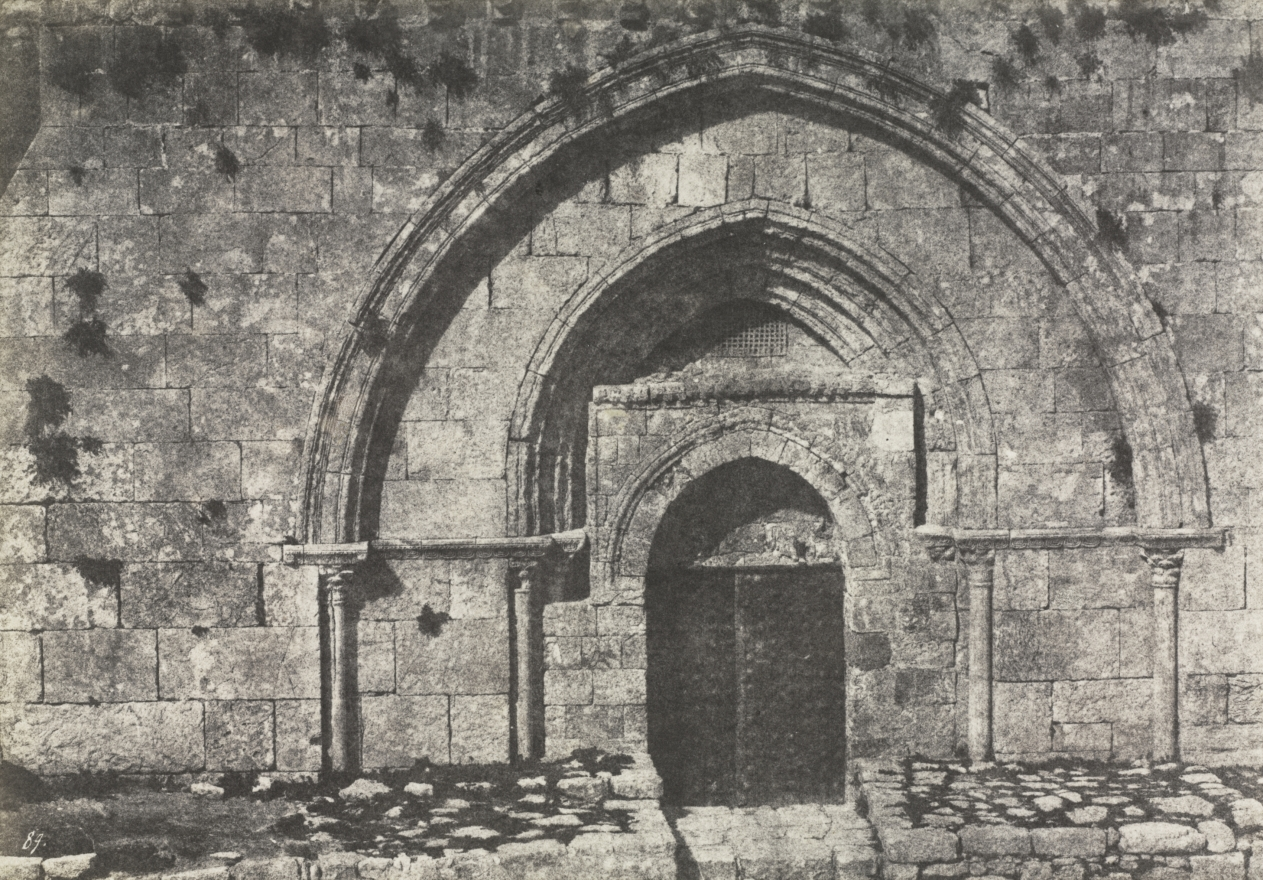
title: Tomb of the Virgin, Jerusalem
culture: France, 19th century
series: Jérusalem: Étude et reproduction photographique des monuments de la ville sainte depuis l'époque Judaïque jusqu'a nos jours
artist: Auguste Salzmann (French, 1824–1872)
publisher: Gide et J. Baudry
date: 1854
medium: salted paper print, Blanquart-Évrard process, from waxed paper negative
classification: Photograph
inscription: Written in negative: "89"; in pencil on verso: "4011"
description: In 1854, Auguste Salzmann was commissioned by the French Ministry of Public Instruction to document the holy city of Jerusalem. His charge was to substantiate the controversial theories about dating ancient ruins proposed by his friend, Louis Félicien de Saulcy, a noted antiquarian. Unlike almost all other photographers documenting architecture in the 19th century, Salzmann relied on extreme close-up views. In this example, he eliminated most of the building, concentrating on the door of the tomb and its surrounding architectural elements. As a result, all indications of scale, terrain, placement, and context normally found in documentary photographs are absent, while the abstract textural and surface qualities of the tomb are emphasized.